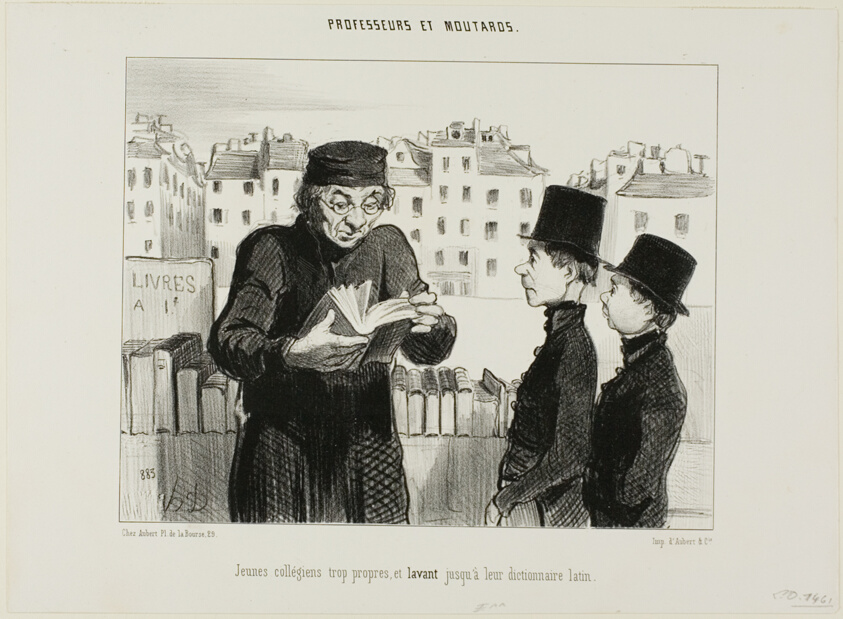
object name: Print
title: Clean Young High School Students, They Even Try Selling Off their Latin Dictionary, plate 24 from Professeurs et Moutards (Professors and Rascals)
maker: Honoré Victorin Daumier; French, 1808-1879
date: 1846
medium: Lithograph in black on white wove paper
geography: France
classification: lithograph; print; prints and drawing